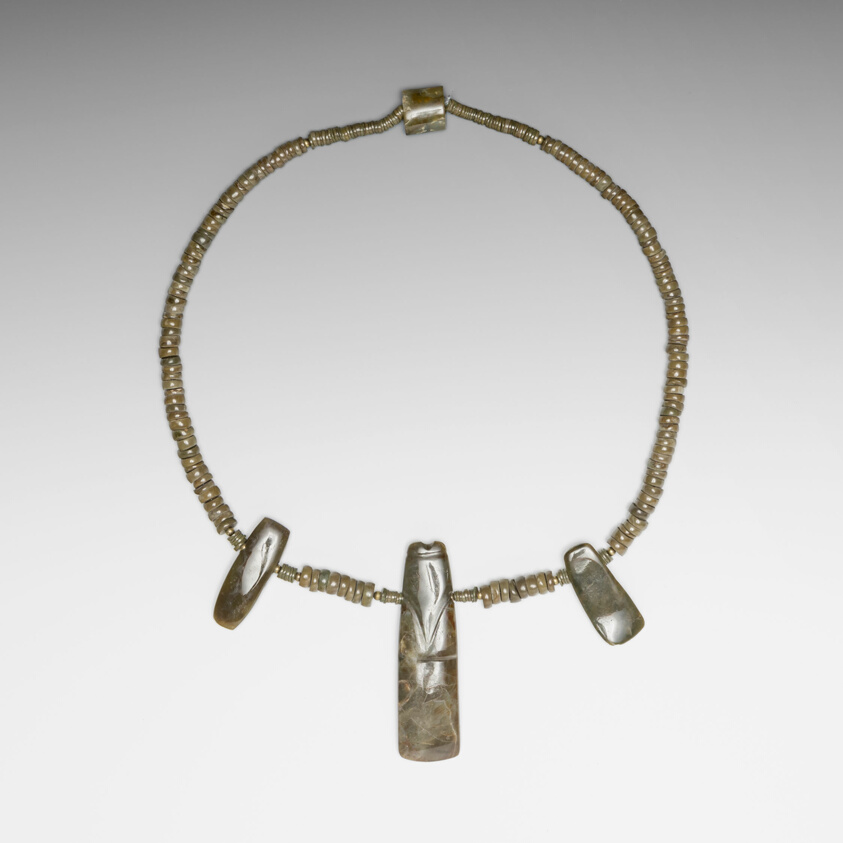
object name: Costume and Accessories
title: Beaded Necklace with Three Celt Pendants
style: nicoya, americas, lower central america, Arts of the Americas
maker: Nicoya (Nicoya, Guanacaste province, Costa Rica)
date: 300–700 CE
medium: Jade with metal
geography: Costa Rica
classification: necklace; bead; art of the americas; jewelry; costume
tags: jewelry